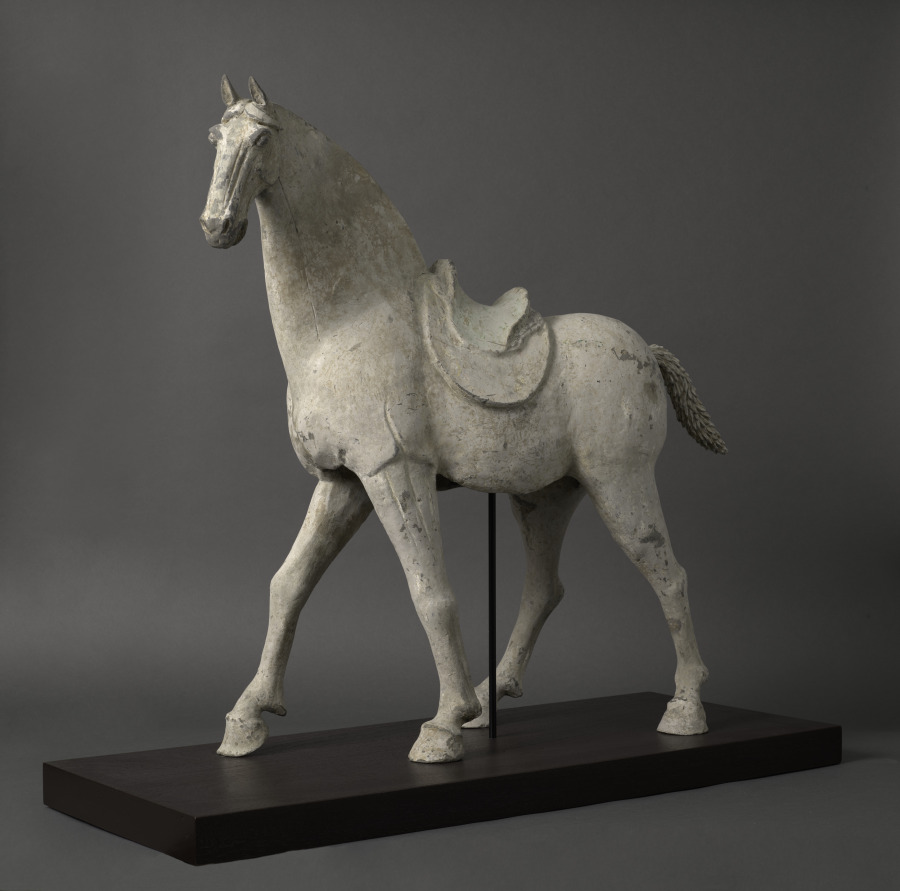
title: A Large Painted Striding Horse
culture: China, Tang dynasty (618–907)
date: 700–800s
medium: Pottery with white slip and mineral colors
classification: Ceramic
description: Horses were symbols of status and power in ancient China, used for military operations, mobility, and entertainment for the elite. Around the second century BCE onward, pottery horses began to be placed in tombs as status symbols and companions of the deceased in the afterworld. This horse is harnessed with a saddle and is exceptionally large. It presents a well-bred specimen that strides forcefully ahead.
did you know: A groove runs over the horse’s neck from its ears to the saddle, indicating that its mane and tail were once filled with real horsehair to render the sculpture more realistic.